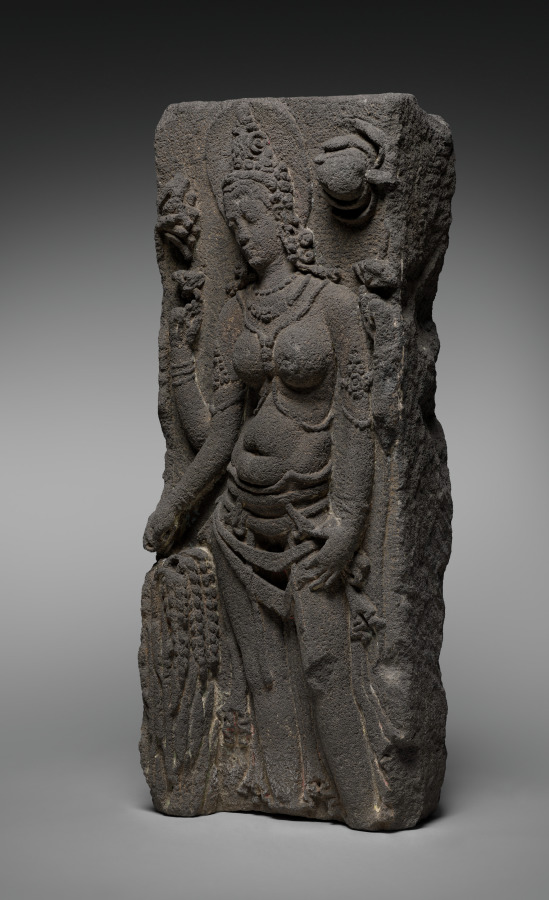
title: Goddess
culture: Indonesia, Central Java, Boyolali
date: 800s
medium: volcanic stone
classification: Sculpture